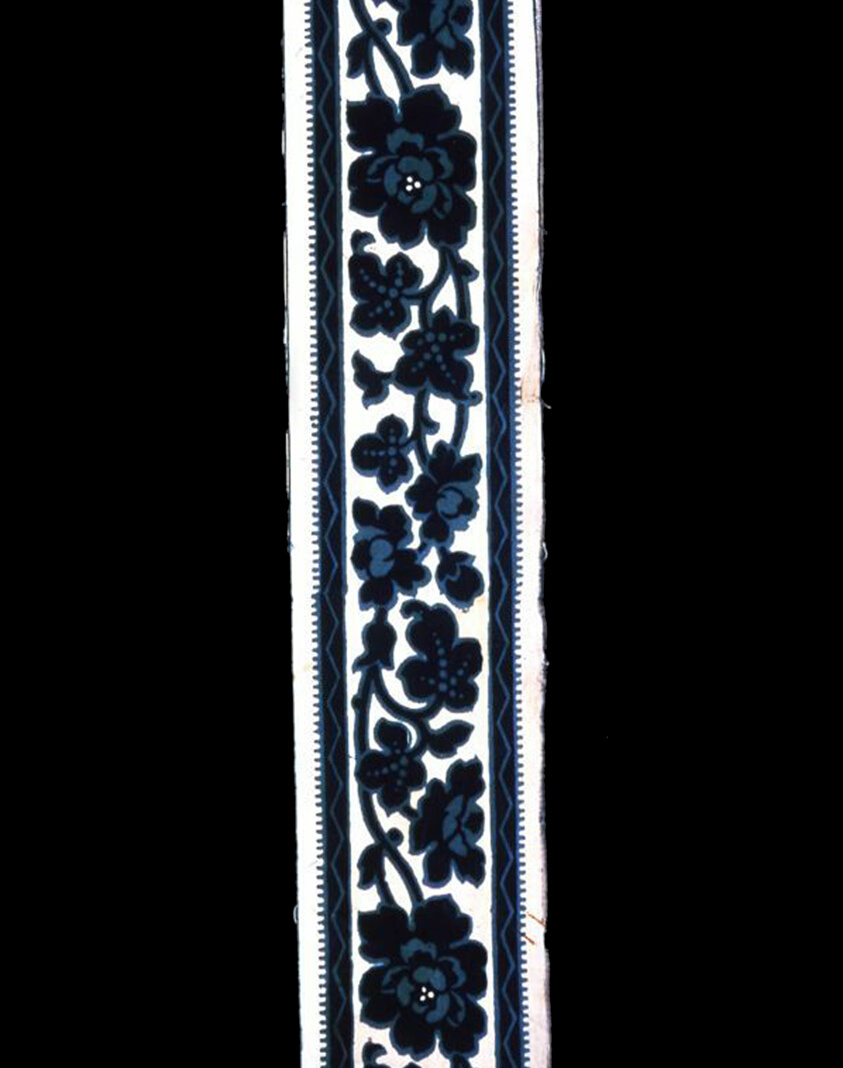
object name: Textile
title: Border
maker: England or United States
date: 19th century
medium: Cotton, plain weave; block printed; glazed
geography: England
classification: textile; weaving - printed